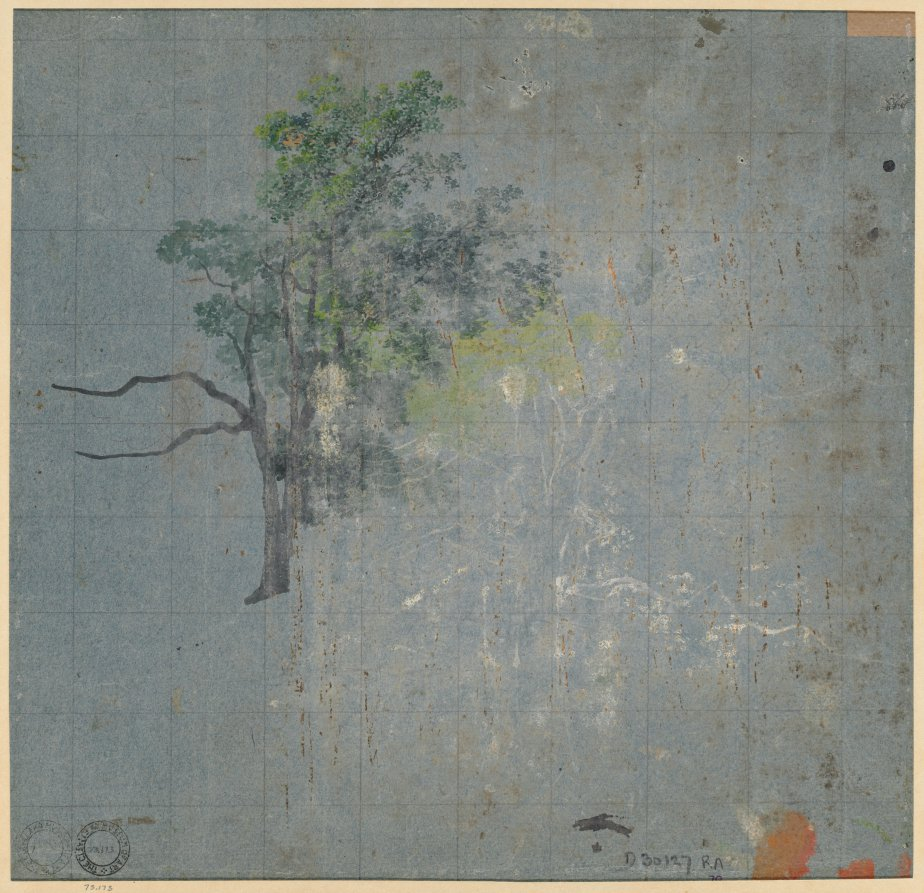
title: Tree Studies (verso)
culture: Germany, 19th century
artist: Johann Jacob Dorner (German, 1775–1852)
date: 1800–1850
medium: gouache; squared in graphite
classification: Drawing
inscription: lower right, in graphite: D 30127 RA ; lower right, in blue ink: [78?] [masked]